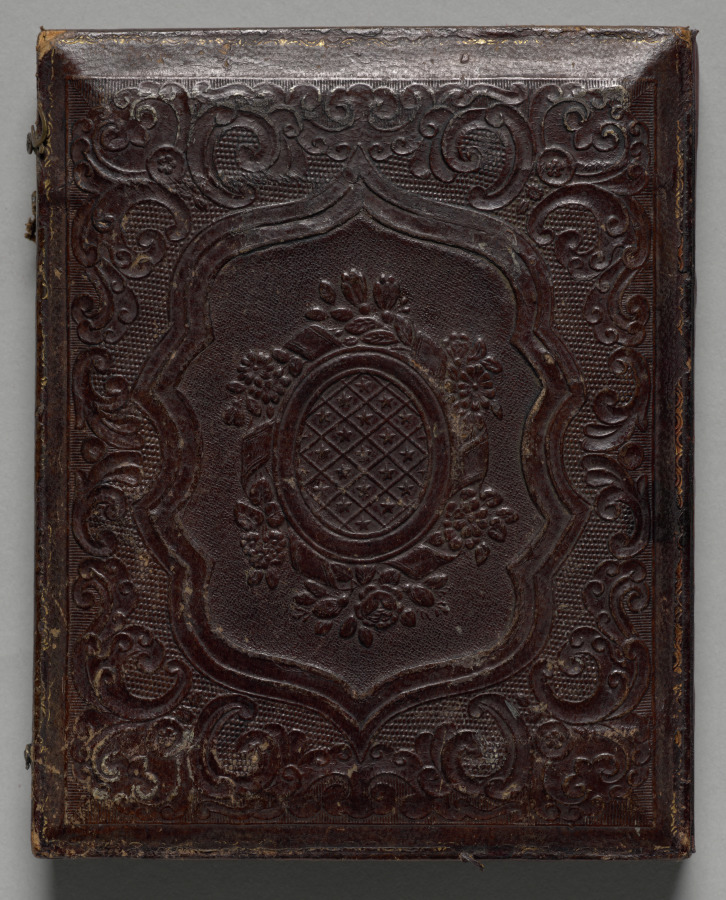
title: Homestead with picket fence and flowers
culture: America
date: c. 1857–65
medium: ambrotype, half plate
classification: Photograph